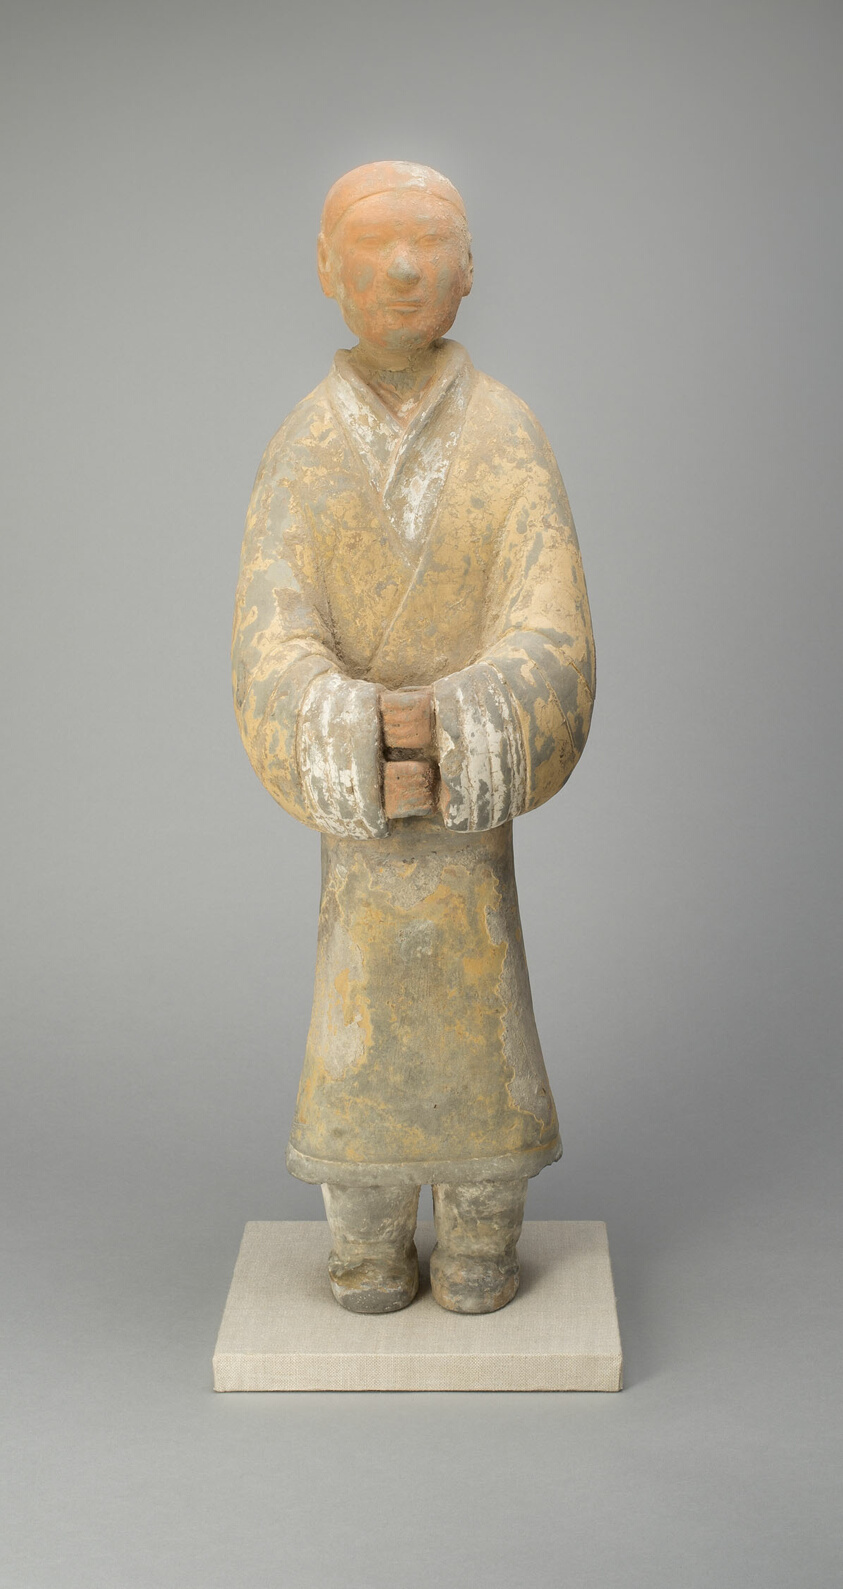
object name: Sculpture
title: Female Attendant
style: Chinese (culture or style)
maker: China; probably Shaanxi province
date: Western Han dynasty (206 BCE–9 CE), about 2nd century BCE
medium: Gray earthenware with slip and polychrome pigments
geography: China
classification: earthenware; ceramics; sculpture; asian art